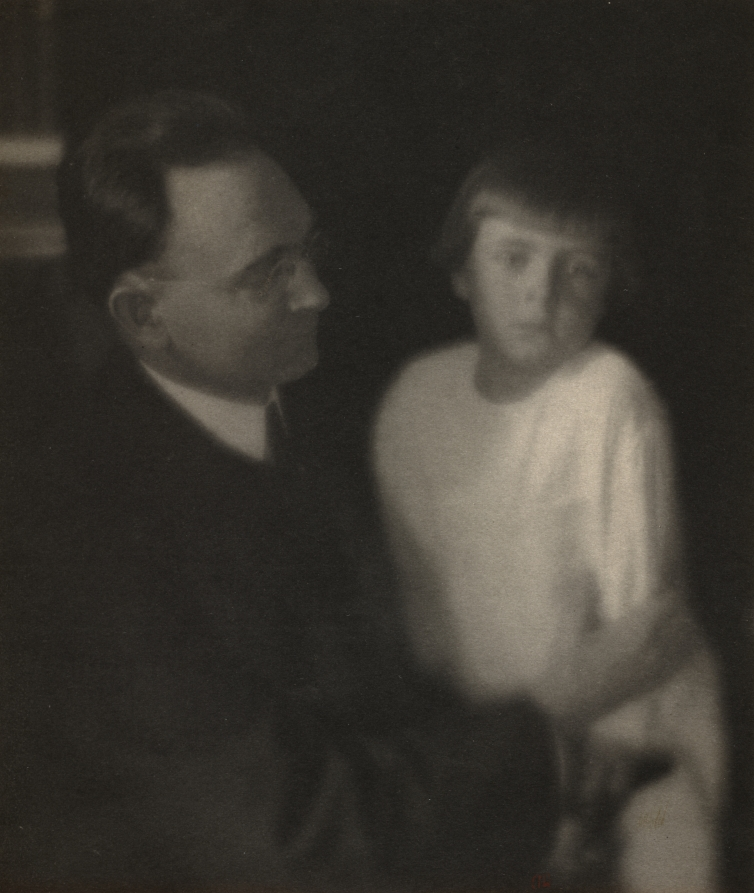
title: Walter L. Flory and John Flory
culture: America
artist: Clarence H. White (American, 1871–1925)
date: 1915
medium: platinum print with pencil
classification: Photograph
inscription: Written in red ink on recto of photo: "CHW"; in pencil on recto of original mount: "Clarence H. White [signed] '15"